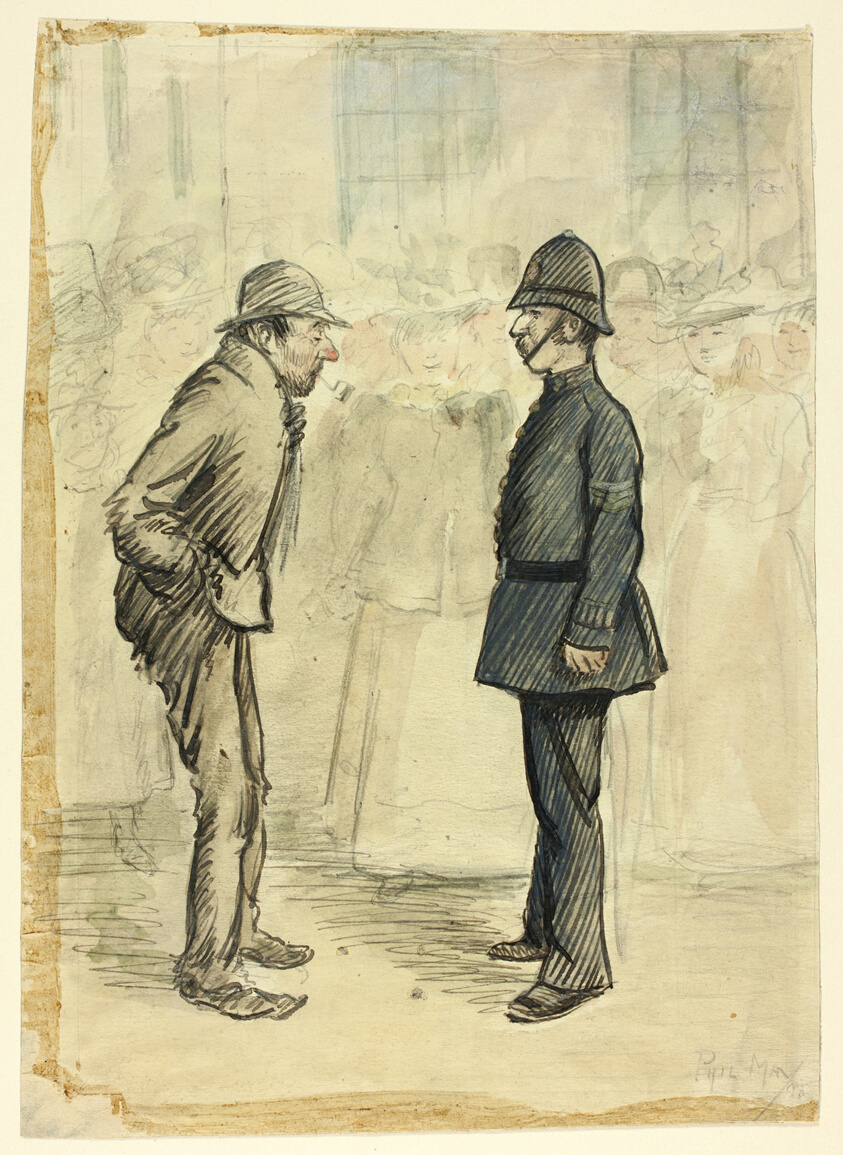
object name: Drawing and Watercolor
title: Policeman and Tramp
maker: Attributed to Philipp William May; English, 1864-1903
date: 1898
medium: Pen and brown ink with brush and watercolor and gouache, over graphite, on ivory wove paper, laid down on brown wove paper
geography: England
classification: pen and ink drawings; drawings (visual works); prints and drawing